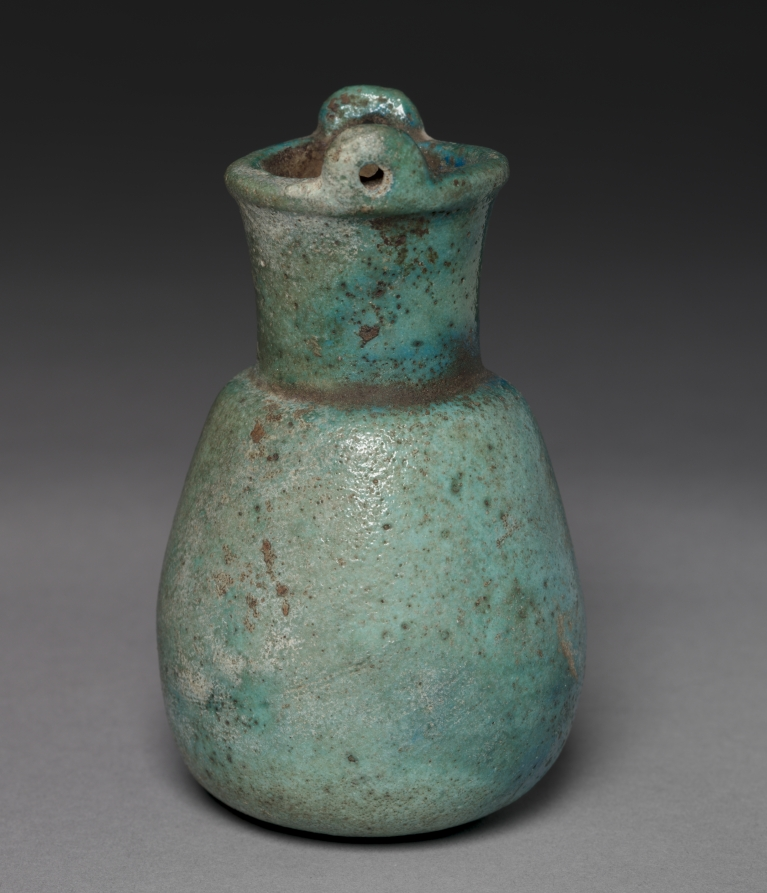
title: Situla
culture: Egypt, Late period (715–332 BCE)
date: 715–332 BCE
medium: turquoise faience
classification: Vessels